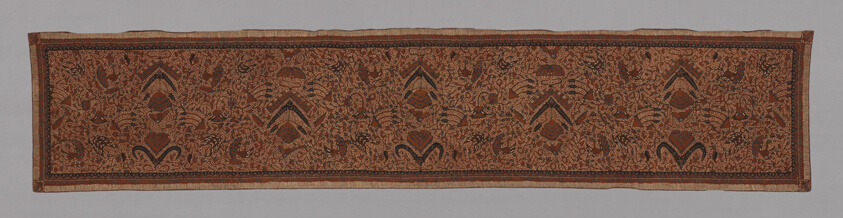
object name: Costume and Accessories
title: Slendang (Shawl)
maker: Indonesia, Central Java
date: 19th century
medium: Cotton, batik dyed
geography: Java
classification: textile; weaving; costume; dress (garment); clothing